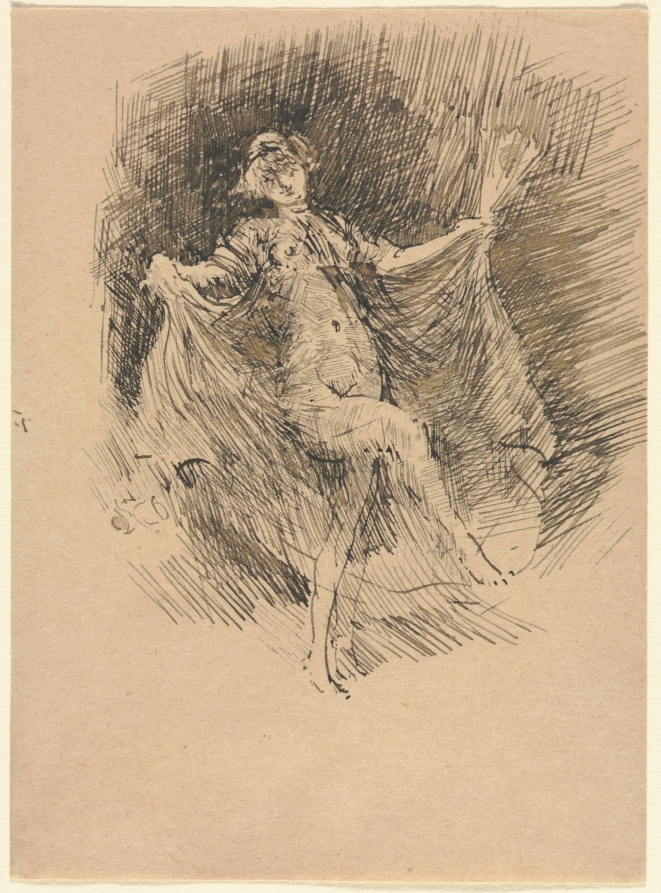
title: The Dancer, No. 1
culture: America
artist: James McNeill Whistler (American, 1834–1903)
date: c. 1900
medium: ink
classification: Drawing